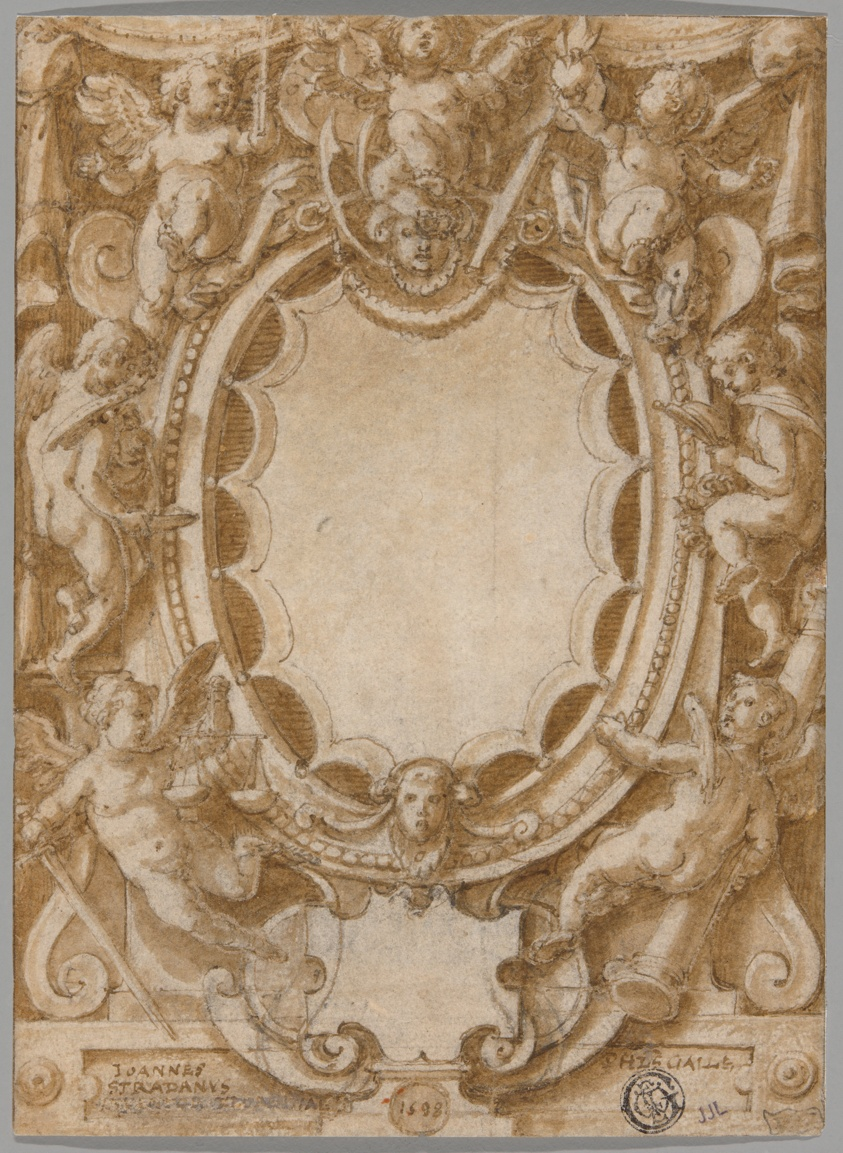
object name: Drawing and Watercolor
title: Design for Frontispiece to the Seven Virtues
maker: Joannes Stradanus, called Giovanni Stradano; Flemish, 1523-1605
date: 1598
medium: Pen and brown ink and brush and brown wash, with touches of opaque white watercolor, over traces of black chalk, on cream laid paper, incised for transfer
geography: Flanders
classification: ink with wash; drawings (visual works); prints and drawing